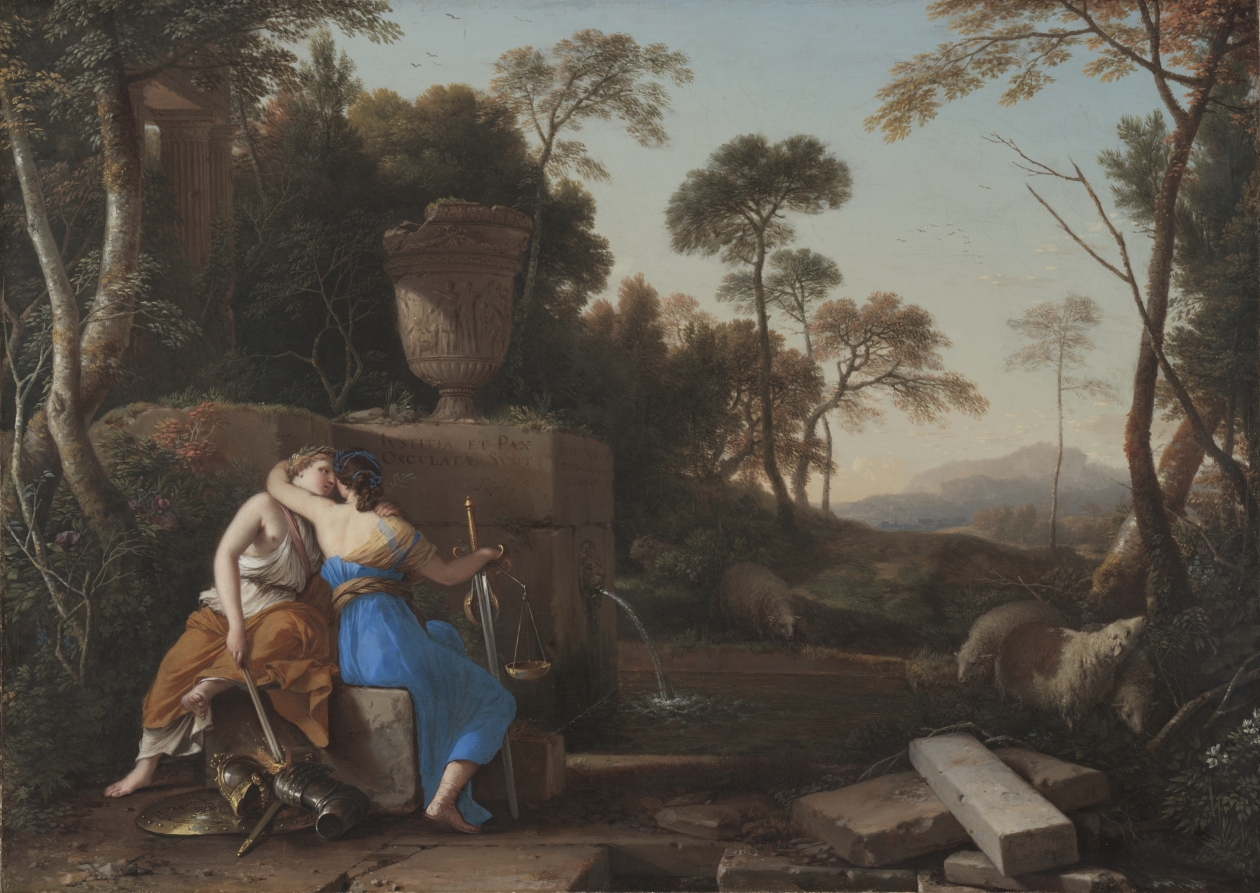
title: The Kiss of Peace and Justice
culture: France, 17th century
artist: Laurent de La Hyre (French, 1606–1656)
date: 1654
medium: oil on canvas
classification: Painting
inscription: signed lower right: L. De La Hyre. / in. & F. 1654 [inscribed on stone in center: IVSTITIA ET PAX / OSCULATAE SUNT / Psal. 84]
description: The figures of Peace (burning the weapons of war) and Justice (holding a sword and scales) embrace in a quiet landscape. The Latin inscription under the antique urn reads “Justice and Peace kissed” (referring to an Old Testament verse, Psalms 85:10). The subject may have had political significance: the painting’s date coincides with the end of the Fronde, a period of civil war in France during which the parlement (courts of appeal) and the nobility sought—unsuccessfully—to limit the power of the monarchy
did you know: While the figures of Peace and Justice may refer to Psalm 85:10, the peaceful, pastoral landscape is described in Psalm 85:12.